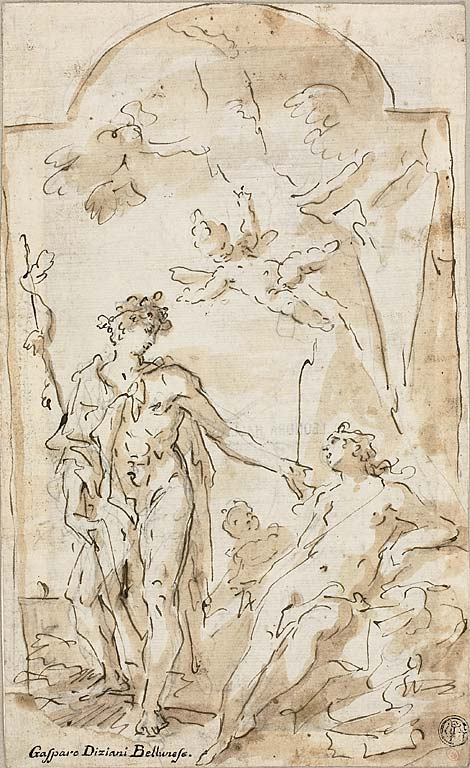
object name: Drawing and Watercolor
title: Bacchus and Ariadne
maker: Gaspare Diziani (Italian, 1689-1767)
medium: Pen and brown ink, with brush and brown wash, over graphite, on ivory laid paper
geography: Italy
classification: pen and ink drawings; drawings (visual works); prints and drawing